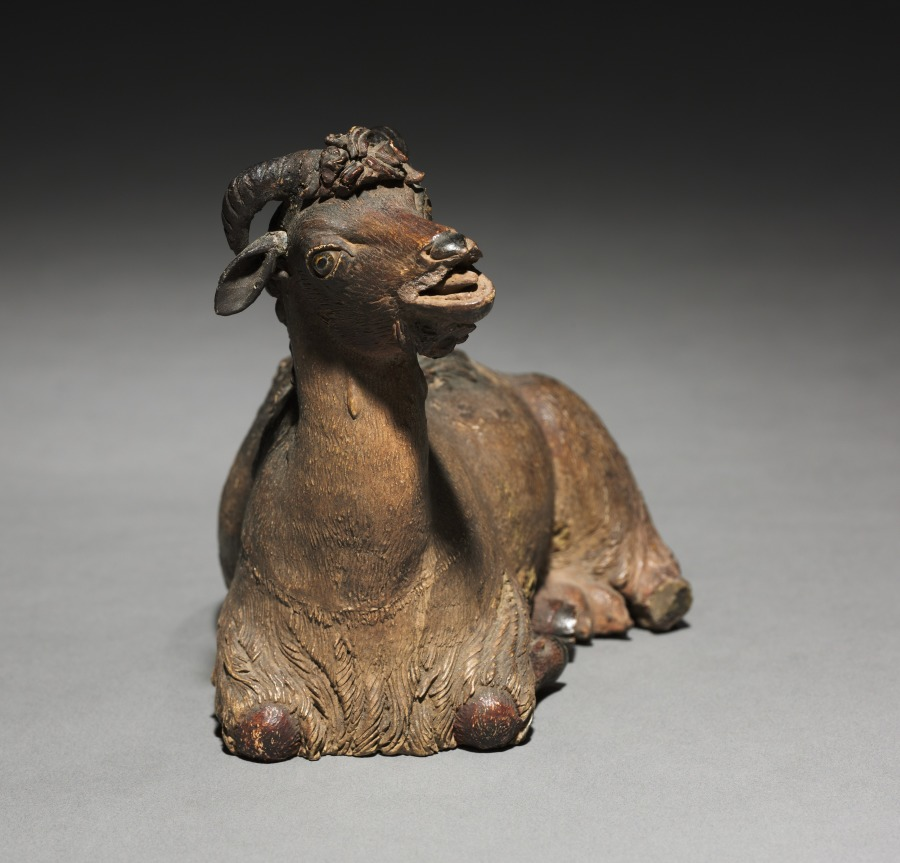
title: Figure from a Crèche: Sitting Ram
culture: Italy, Naples, late 18th-early 19th century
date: 1780–1830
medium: painted terracotta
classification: Sculpture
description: The practice of creating scenes of the Nativity for the home dates from the early 1700s in Italy, where people began to set up doll-like figures of about a foot or less in height. The custom was particularly popular in Naples around 1800, where crèche scenes (crèche means cradle, or crib) included many figures, whose heads and hands of painted terracotta, stuffed cloth bodies, and clothing adapted from contemporary local costumes gave them an amazingly realistic character. Representations of the birth of Jesus can be traced to the first few centuries of Christianity. Both living creatures and sculptural depictions of them were used from early times. By the late middle ages it was customary to create life-size figures of wood or stone, naturalistically painted, to represent the characters who participated in the events of Jesus's early life. These sculptures were then arranged in scenes illustrating one or both of the most important of these events, the Adoration of the Shepherds and the Adoration of the Magi-the three kings from the East who came to pay homage to the Christ child. Used in churches, these large figures were especially popular in Italy, Central Europe, Spain, and Portugal. This Object in Focus presentation was organized by Henry Hawley, Curator of Renaissance and Later Decorative Arts and Sculpture.